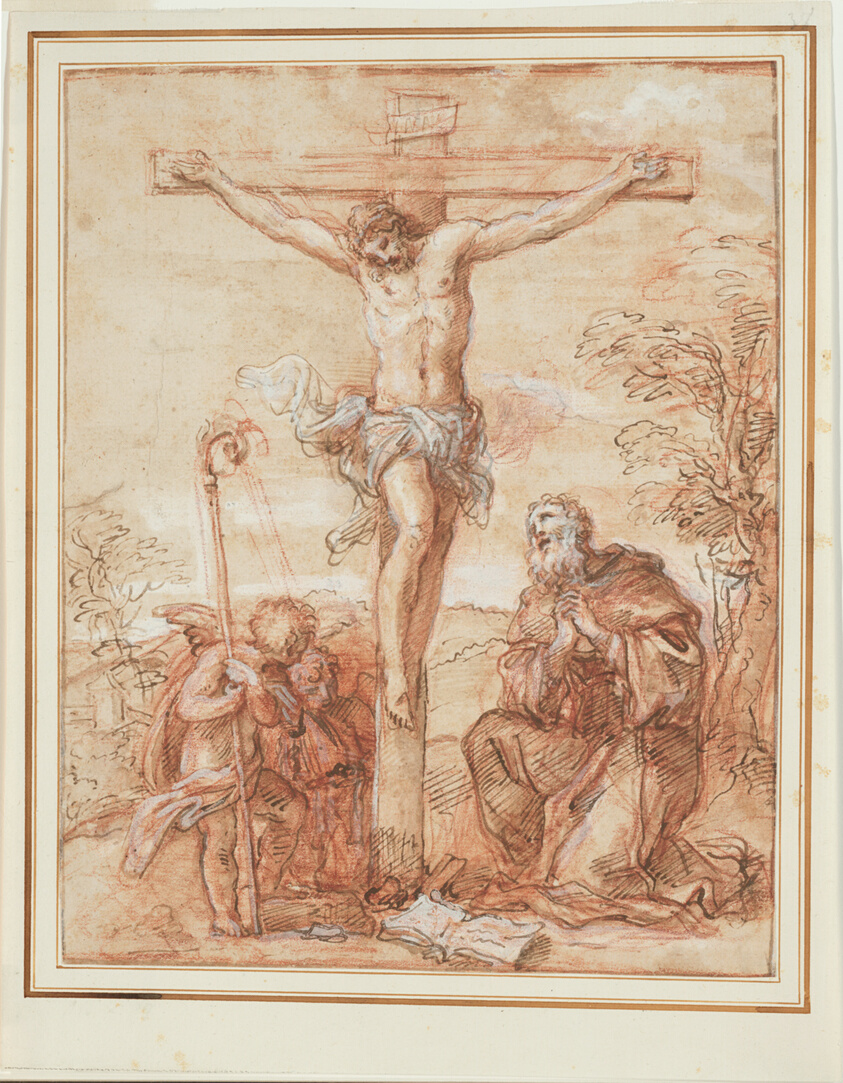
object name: Drawing and Watercolor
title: Saint Augustine and Two Angels Adoring the Crucifix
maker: Giuseppe Passeri (Italian, 1654-1714)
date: 1685/1695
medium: Pen and brown ink, heightened with lead white, over red chalk on cream laid paper, laid down on cream laid paper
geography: Italy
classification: pen and ink drawings; drawings (visual works); prints and drawing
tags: diamond shapes, Christian subjects, mythology, prints and drawings, saints, knots, crucifixions